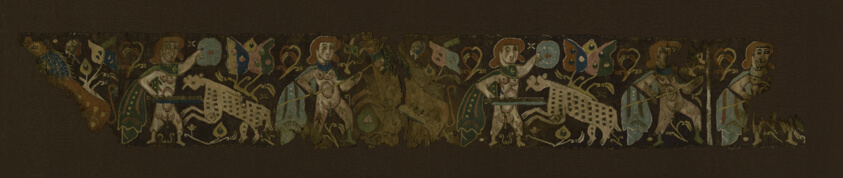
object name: Textile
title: Border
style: roman period (egyptian)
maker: Coptic (Egypt)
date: Roman period (30 B.C.– 641 A.D.)/Arab period (641–969), 6th/8th century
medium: Wool and linen, slit and dovetailed tapestry weave with eccentric wefts and wrapped outlining wefts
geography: Egypt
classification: textile; weaving